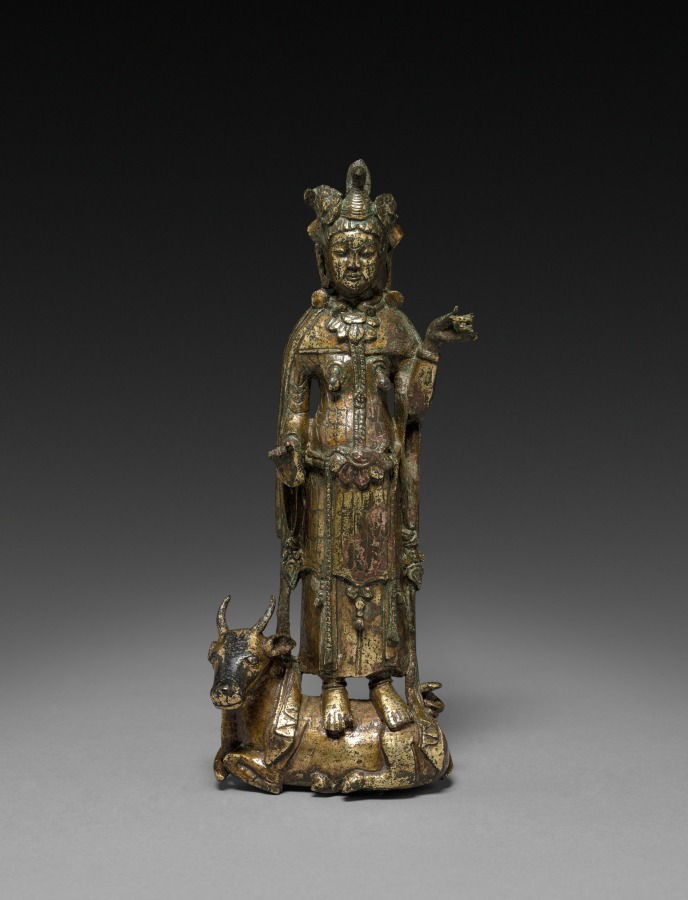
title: Maheshvara (Shiva) Standing on a Bull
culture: China, Six Dynasties period (317-581), Northern Qi dynasty (550-577)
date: Six Dynasties Period (317–581), Northern Qi Dynasty (550–577)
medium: gilt bronze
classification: Sculpture